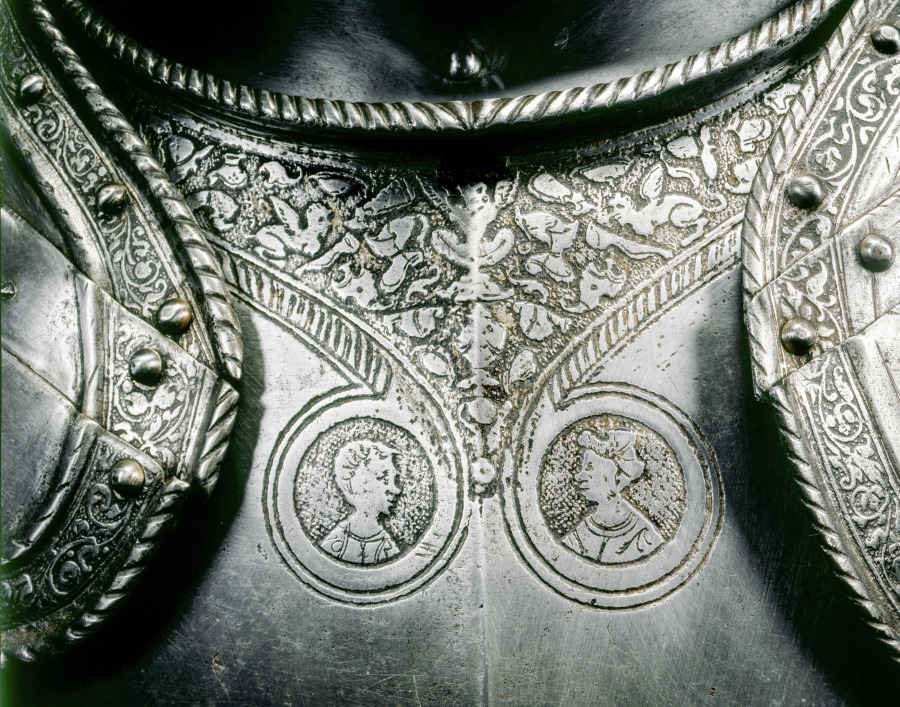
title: Proper Left Tasset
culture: North Italy, Brescia (?), 16th century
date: c. 1575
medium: steel with etched decorative bands and roundels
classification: Arms and Armor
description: Decoration was critical to fine armor, and etching was the most commonly used technique. Here, the bands along the borders are etched. On the breastplate, pauldrons (shoulder guards), and tassets (hip and upper leg guards), etched medallions enclose profile busts reminiscent of ancient Roman portraits. The lance rest on the breastplate indicates that this half-suit was once part of a complete field armor for man and horse. The etching technique used for armor was developed in the late 1400s. The metal surface was first coated with an acid-resistant substance, such as wax or varnish. An etching needle was then used to scratch a design into the surface. The exposed areas were then treated with an acid that would "bite" or etch the lines into the metal. When the coating was removed, the etched design was blackened for contrast.